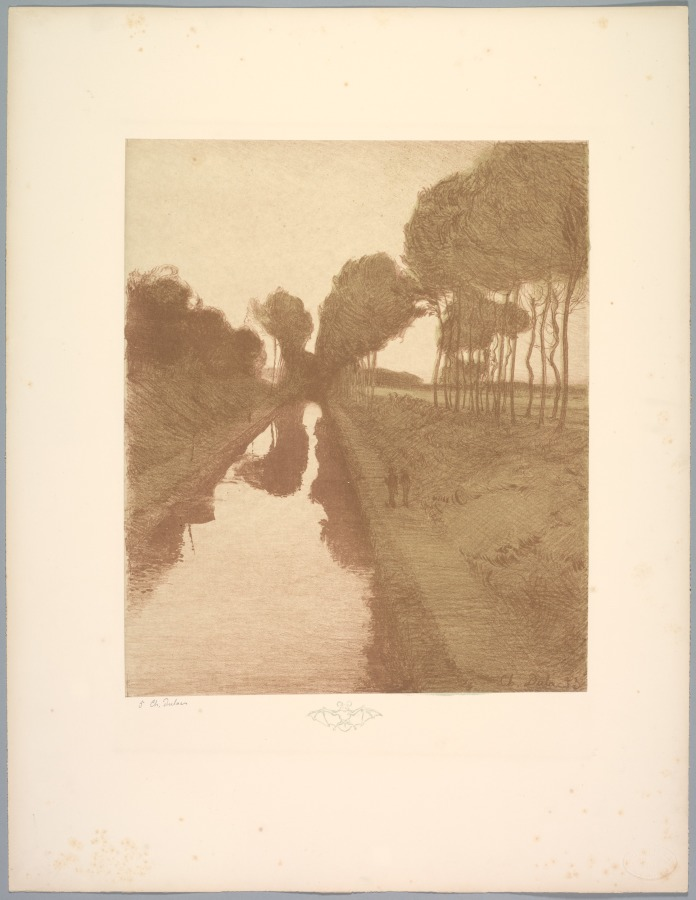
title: Suite de Paysages: Landscape, Plate 3, Remarque, Bat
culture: France, 19th century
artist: Charles Marie Dulac (French, 1865–1898)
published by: Printed by Monrocq Frères, Paris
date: 1892–1893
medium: color lithograph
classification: Print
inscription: Below image, left, in graphite: 5 Ch. Dulac; Im place, lower right corner: Ch. Dulac t3 Lower right corner, blindstamp: MONROCQ FRÈRES / ÉDITEURS IMPRIMEURS / PARIS / RUE SUGER, 3 encircled